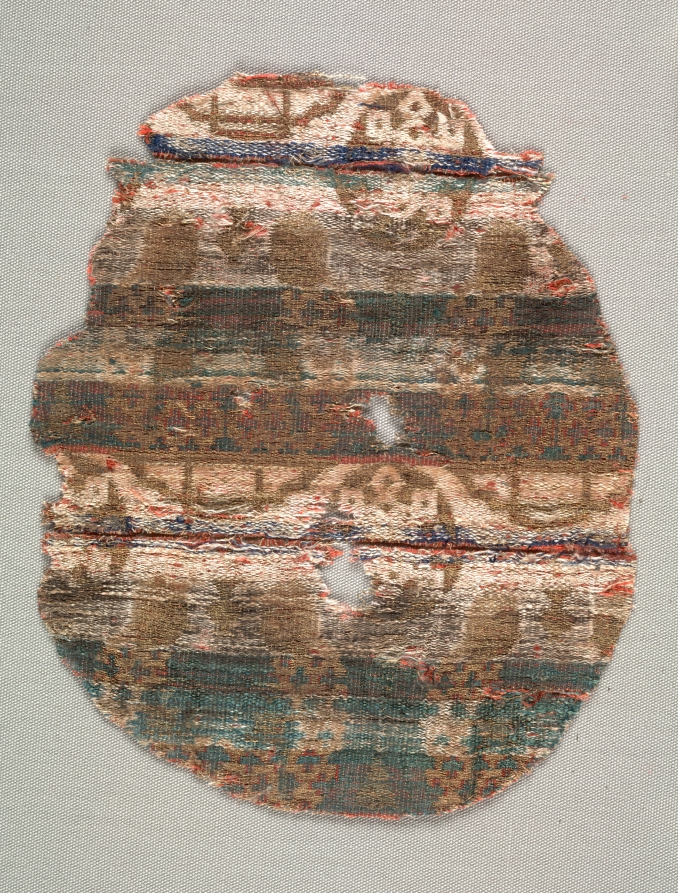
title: Fragment with musicians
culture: Spain, probably Almeria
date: 1200s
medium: Silk and gold thread: lampas weave with areas of double cloth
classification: Textile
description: The repeating pattern features female musicians playing tambourines. They wear long blue and blue-green robes in alternate rows. A lamp hangs between them, suggesting an evening setting. Traces of their black hair peek out from under red headdresses. This textile, along with several other fragments, was found within the pages of a Christian manuscript in the Cathedral of Vich, near Barcelona in northeastern Spain.